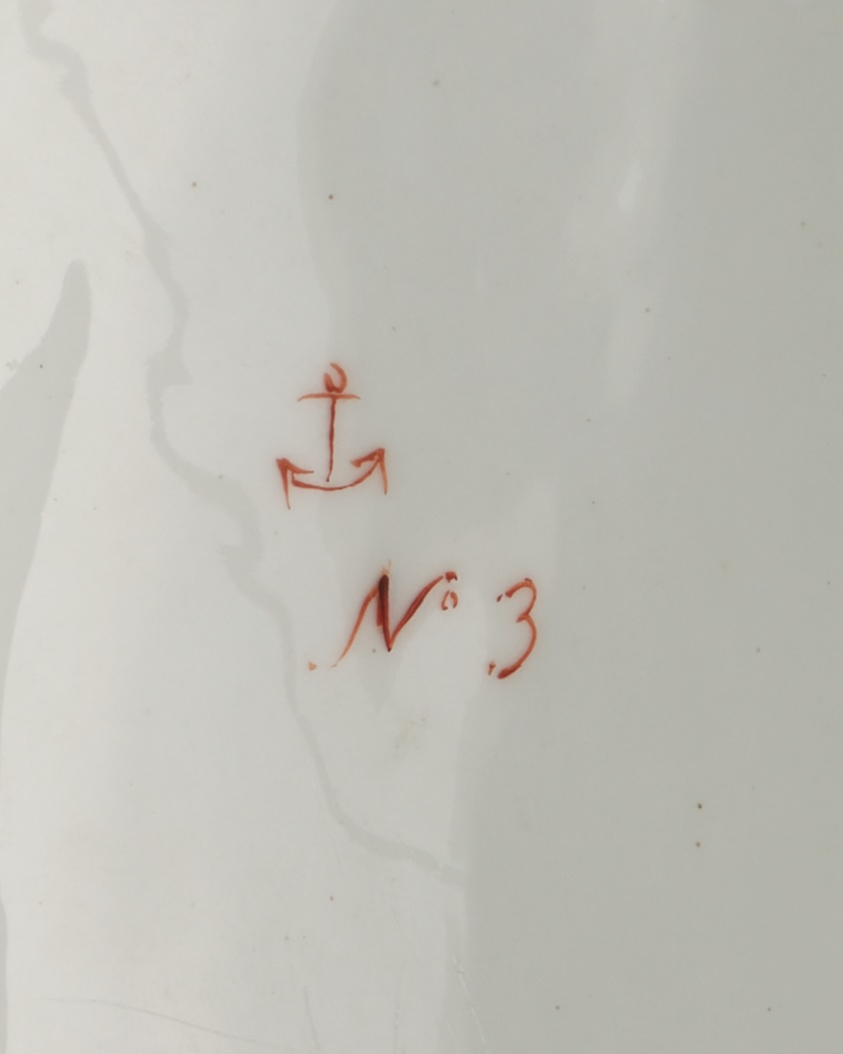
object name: Ceramics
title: Tureen in the form of a Rabbit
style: Rococo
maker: Chelsea Porcelain Manufactory; English, c. 1745–1784; London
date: 1755–56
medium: Soft-paste porcelain and polychrome enamels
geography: Chelsea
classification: tableware; porcelain; european decorative arts; ceramics